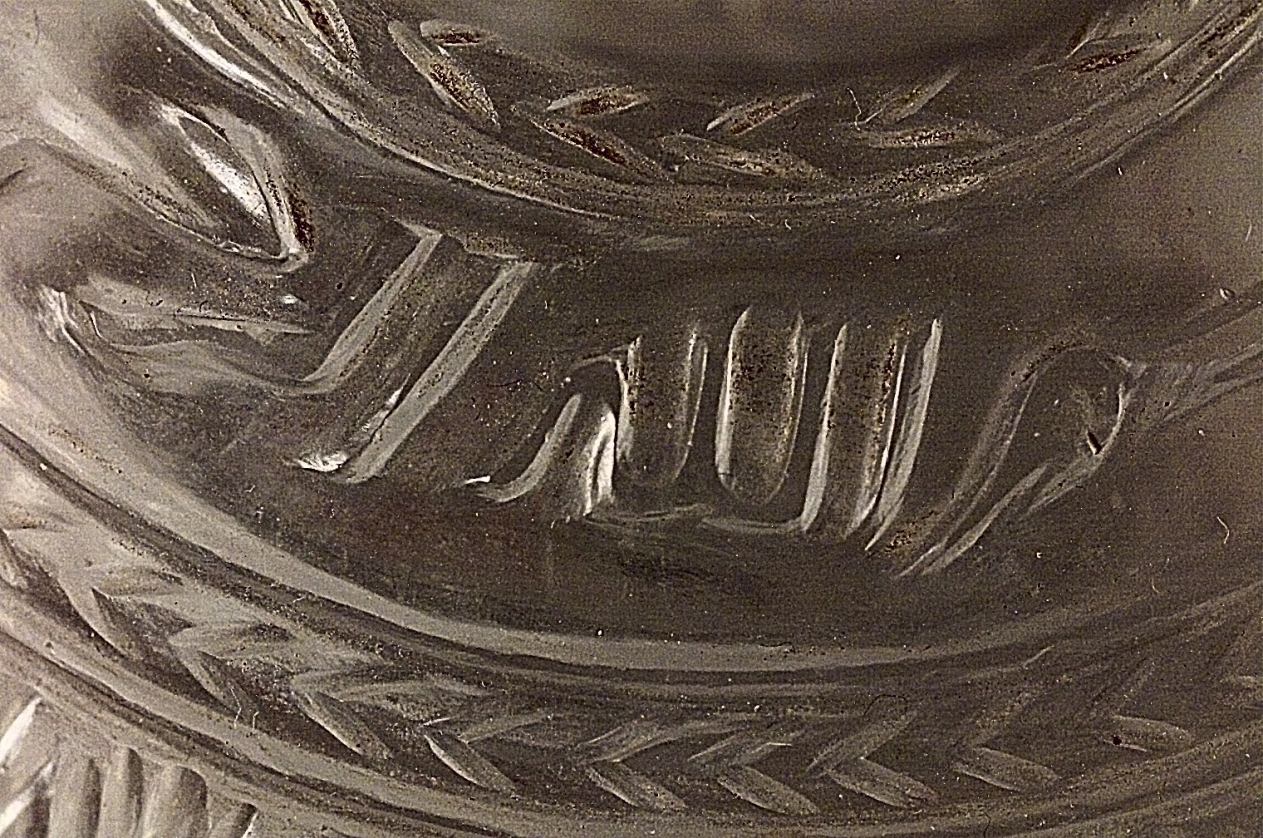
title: Hookah Bowl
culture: India, Mughal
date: 1700s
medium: glass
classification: Glass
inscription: Inscription in Farsi, on body: Even if live charcoal is placed on its head/ The hookah, a teacher of etiquette,/ will not respond unless drawn upon;/ Thus one can learn from its manners of refinement.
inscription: Inscription in Farsi, on shoulder: In the name of Allah the clement and merciful is the key to the wise treasure.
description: The inscription around the body of the base speaks to the use of the hookah in the decadent life of the Mughal court. The hookah is commended for being a proper, refined servant who will not “respond unless drawn upon” or, produce water bubbles when smoke is drawn through the hose. Undoubtedly the witty, poetic allusions would have been appreciated at banquets and other courtly gatherings. The use of wheel-cut glass for this hookah base may have been influenced by English glass and lead crystal that was exported to India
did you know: Around the top of this hookah bowl are incised the opening two lines from the Khamsa (Quintet) of the celebrated Persian poet Nizami (1141–1209).